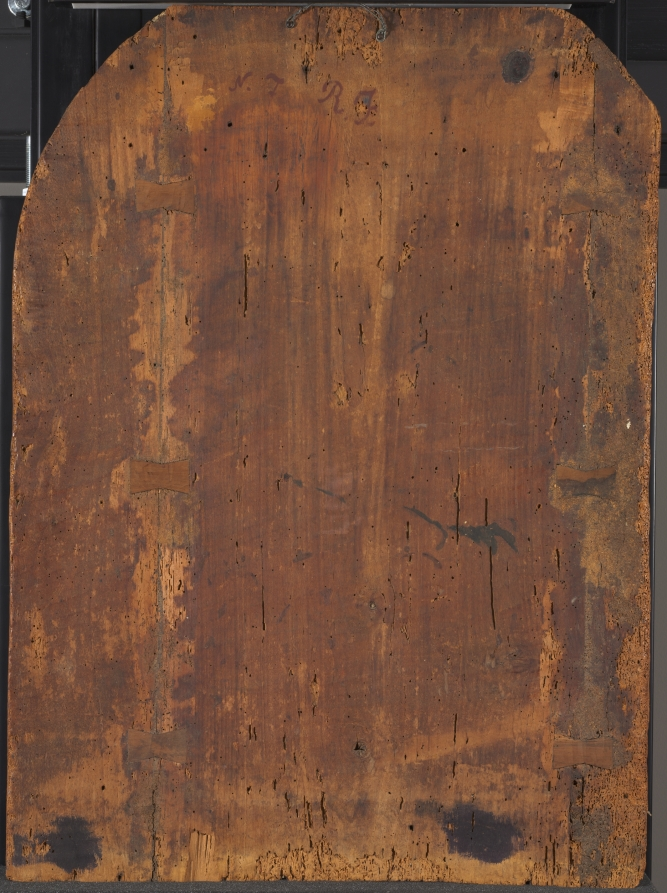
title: Icon of the Mother of God and Infant Christ (Virgin Eleousa)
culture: Republic of Venice, Kingdom of Candia, Candia (Heraklion, Crete, Greece) or Byzantine Empire, Constantinople (Istanbul, Turkey)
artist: attributed to Angelos Akotantos (Cretan, died 1450)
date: c. 1425–50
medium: tempera and gold on wood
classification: Painting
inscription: None visible on obverse; unidentified inscriptions on reverse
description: This large icon of a tender embrace between the Virgin Mary and Christ likely hung on a Greek Orthodox church’s iconostasis, a screen separating the congregation from the altar-containing sanctuary, which only clergy could enter. A skilled painter of faces and draperies, Angelos Akotantos was among Crete’s most sought-after artists. Based in Byzantium’s artistic center in his hometown of Candia, he painted for imperial clients and beyond. Despite theological differences, Cretan icons of Mary were popular in Ethiopia. In the early 1500s, Emperor Lebna Dengel sent monks Zekre and Pawli to acquire Cretan icons for him. Twenty-nine Cretan icons are still venerated (honored) in Ethiopian churches.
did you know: This is the only known work by Angelos Akotantos in the United States.